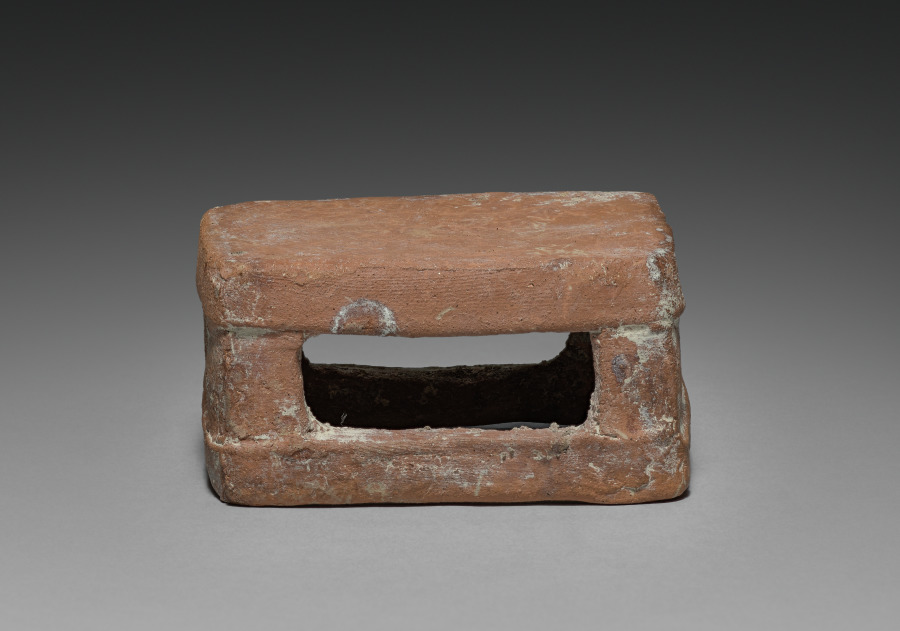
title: Seated Lord with Removable Headdress: Stool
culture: Mesoamerica, Maya, probably Jaina Island, Late Classical period, 7th-9th century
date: 600–800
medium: ceramic and slip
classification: Ceramic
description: The major Maya grave offerings on Jaina Island were ceramic figurines that depict deities and humans in a variety of roles. The stool belongs to a seated figure who represents a male, perhaps another warrior, who wears a huge zoomorphic headdress.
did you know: It is estimated that some 20,000 people were buried on the tiny island of Jaina over a 500-year period.